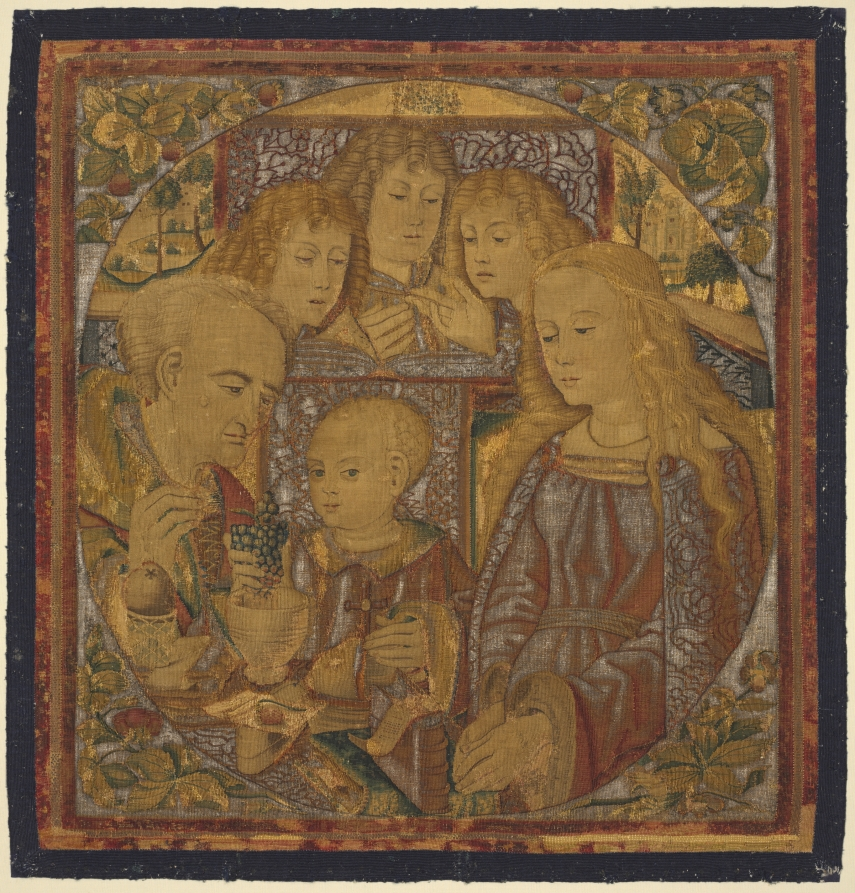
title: The Mystical Grapes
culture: Flanders, possibly Bruges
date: c. 1500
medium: Wool, silk, silver thread; tapestry weave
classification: Tapestry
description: This tapestry illustrates the symbolic relationship between wine and Christ’s blood that forms a central belief of the Catholic faith. Flanked by the Virgin Mary and Joseph, the Christ child squeezes grapes into a chalice, symbolizing the gift of his blood for the redemption of humankind. With its small scale, luxurious metallic threads, and extraordinary detail, the tapestry was intended to aid in private devotion. Locking eyes with the infant Christ, the fruit of the Virgin’s womb (represented by the pomegranate in the glass), the user would contemplate Christ’s fate.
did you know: Tapestries were among the most expensive material goods in the medieval and early modern periods. Nevertheless, they were ubiquitous among the upper echelons of society who used them to decorate and warm their drafty living spaces.